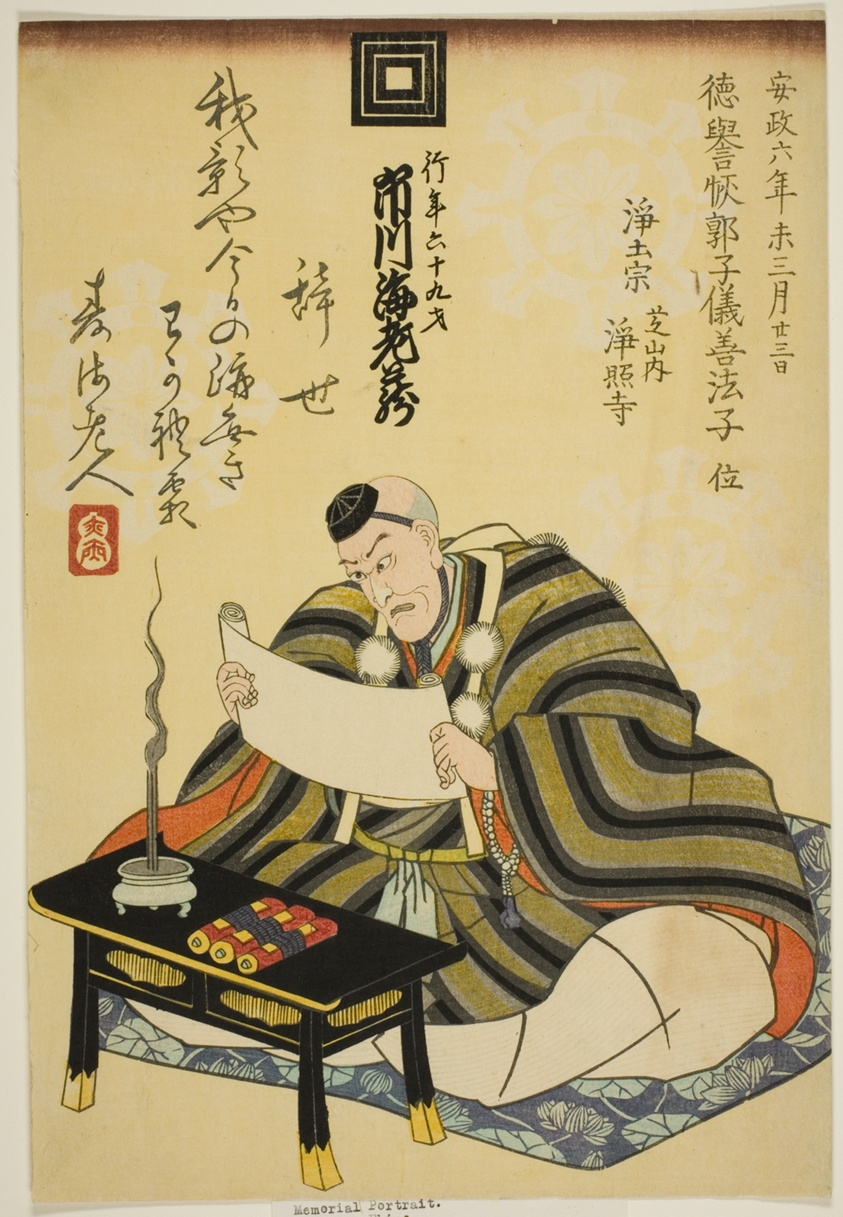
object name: Print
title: Memorial Portrait of the Actor Ichikawa Ebizo V (Danjuro VII)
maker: Utagawa School (Japanese, 19th century)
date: 1859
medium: Color woodblock print; oban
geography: Japan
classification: print; asian art